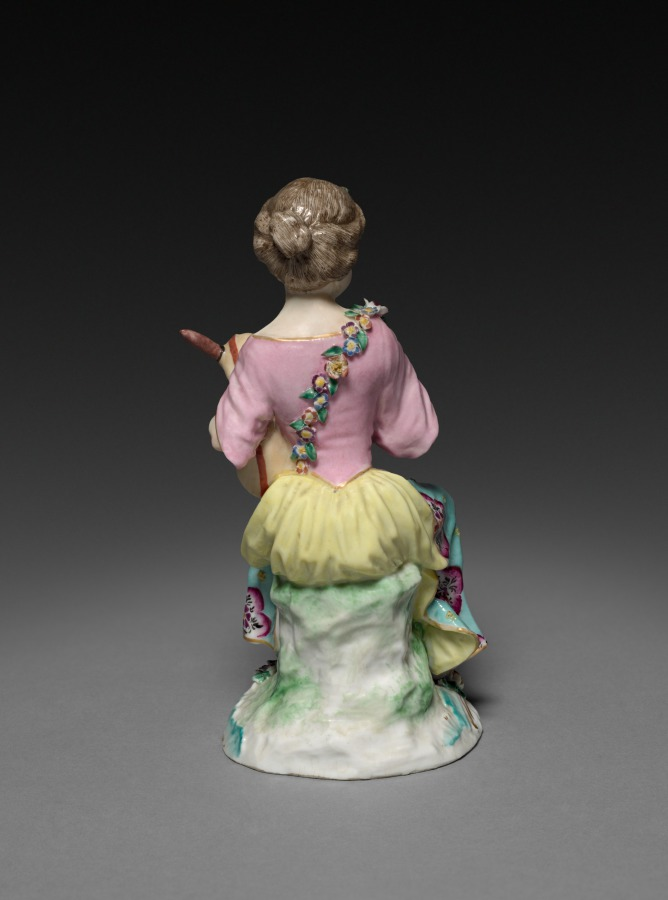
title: Girl Musician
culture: Germany, 18th century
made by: Frankenthal Porcelain Factory (German)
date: c. 1770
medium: porcelain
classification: Ceramic